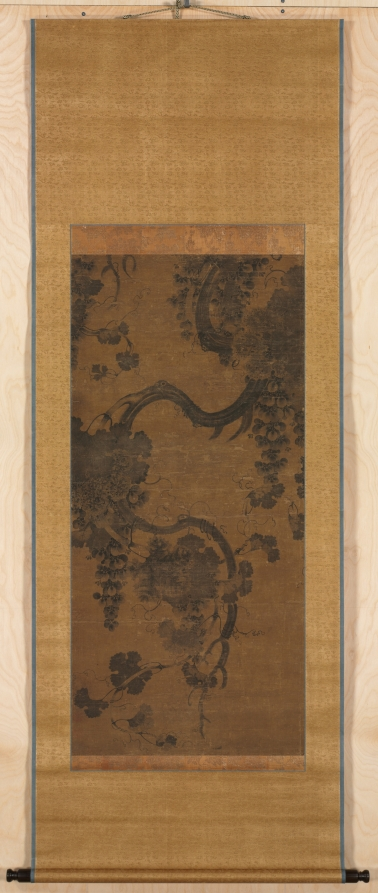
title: Grapes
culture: Korea, Joseon dynasty (1392–1910)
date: 1700s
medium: hanging scroll, ink on silk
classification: Painting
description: Grapes began to be employed as artistic motifs in Korean art after their introduction to the peninsula around the 600s through the Silk Road, the ancient global trade route. Artists used them to embellish the surfaces of mother-of-pearl lacquer boxes and blue-and-white porcelain, while scholar-poets composed poems about the luscious sweet sourness of green grapes. Grape paintings such as this were hung on a wall especially in a scholar’s elegant study during the summer season when deep blue grapes ripen.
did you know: Grape wine was introduced to the Korean court in the 1200s, but the common classes did not have many opportunities to enjoy it until the 20th century.